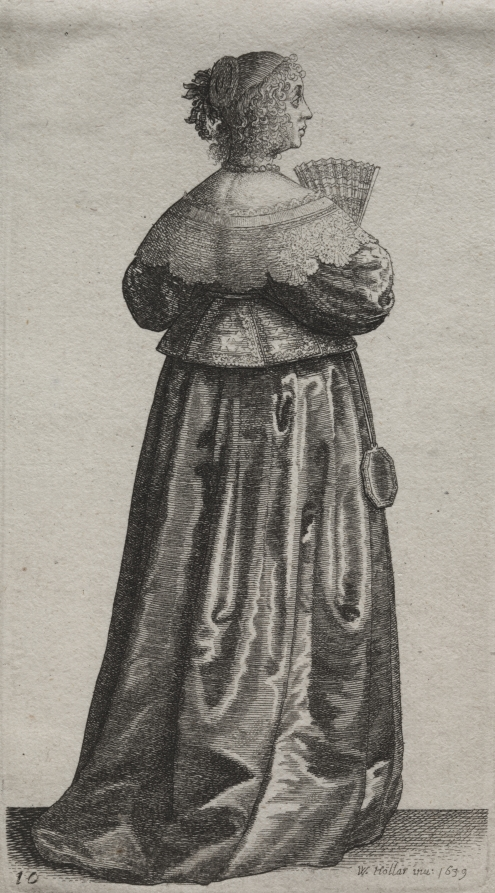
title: The Several Habits of English Women, from the Nobility to the Country Women as they are in these times: The Woman with a Fan and Mirror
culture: Bohemia, 17th century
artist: Wenceslaus Hollar (Bohemian, 1607–1677)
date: 1639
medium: etching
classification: Print